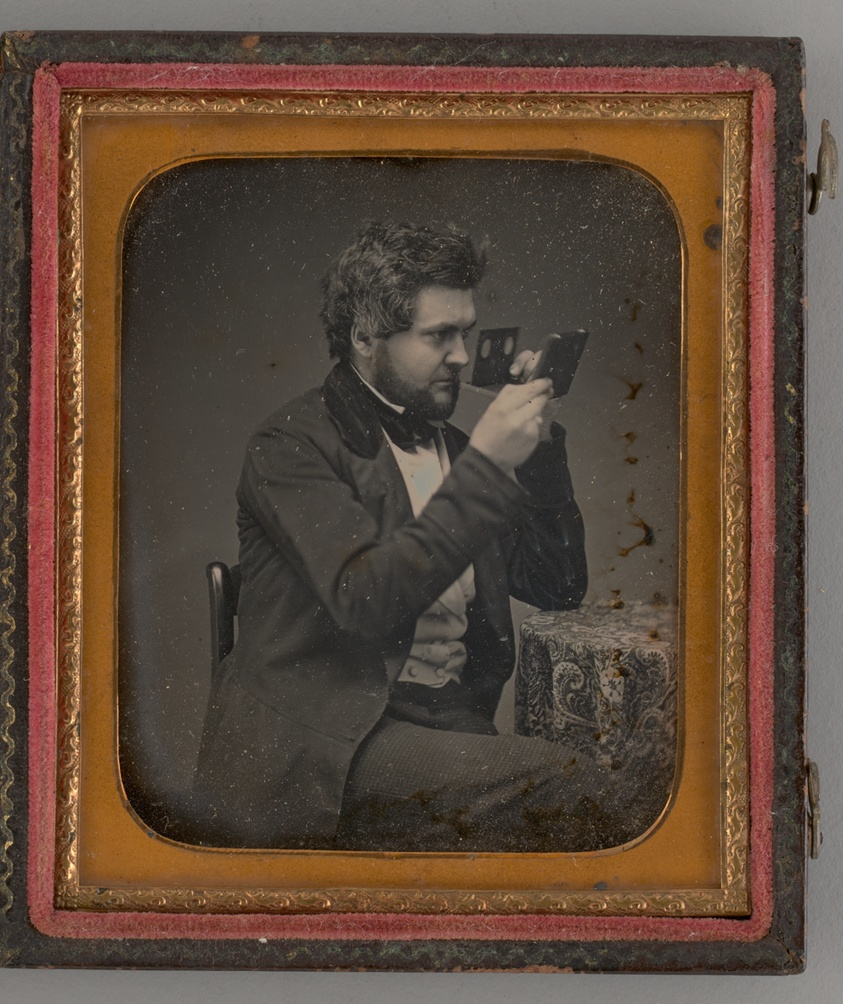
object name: Photograph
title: Untitled (Portrait of Man Looking Through a Stereoscope)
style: 19th century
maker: Unknown maker; American, 19th century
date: 1856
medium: Daguerreotype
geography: United States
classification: portrait; photograph; photographic process; photography; portrait; daguerreotype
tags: lundberg collection, portraits, portraits: male subject, Male